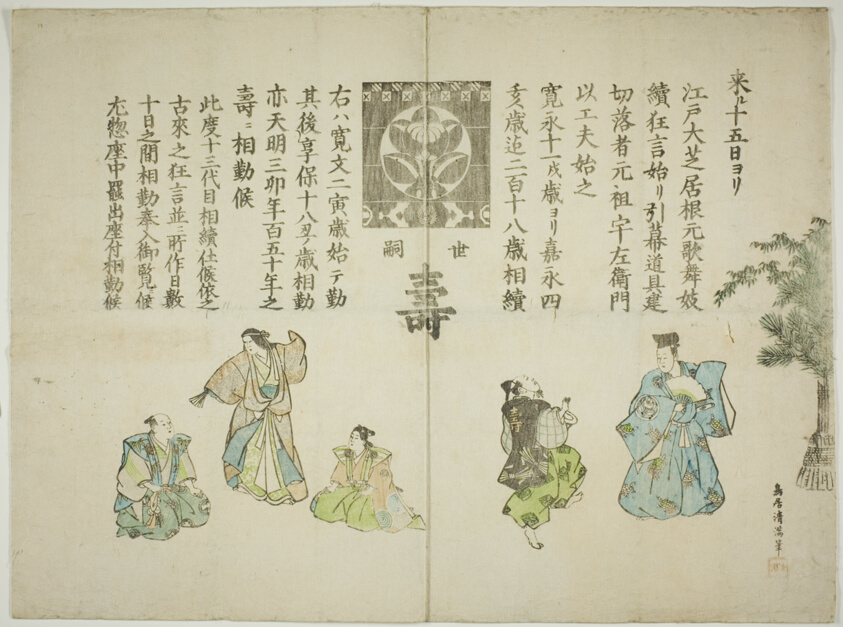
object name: Print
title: Announcement of the ten day performance celebrating the succession of Ichimura Uzaemon XIII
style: Japanese (culture or style)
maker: Torii Kiyomitsu II (Kiyomine) (Japanese, 1787–1868)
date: 1851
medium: Color woodblock print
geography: Japan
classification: woodblock print; print; asian art